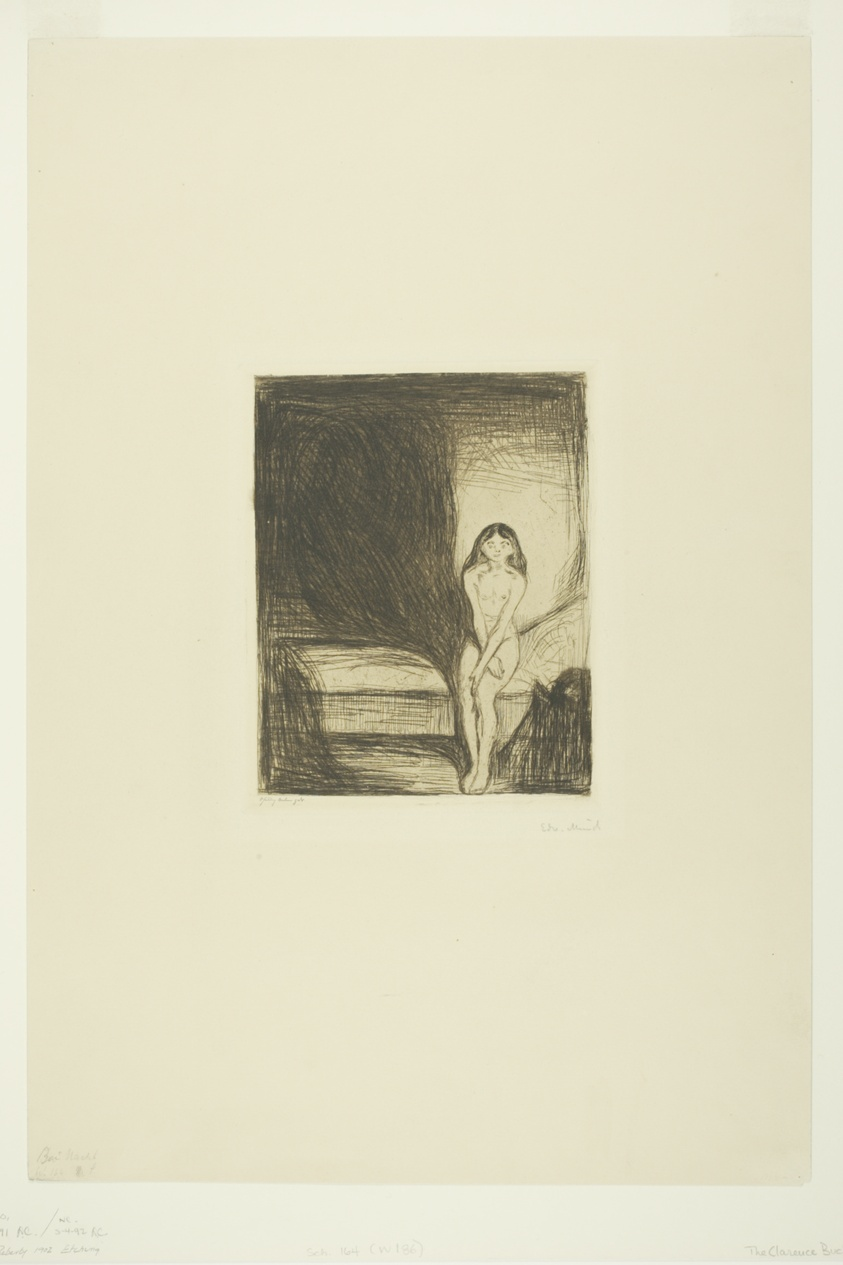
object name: Print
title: Puberty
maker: Edvard Munch (Norwegian, 1863-1944); printed by Otto Felsing (German, born 1854)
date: 1902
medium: Etching in black on cream wove paper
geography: Norway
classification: etching; print; prints and drawing